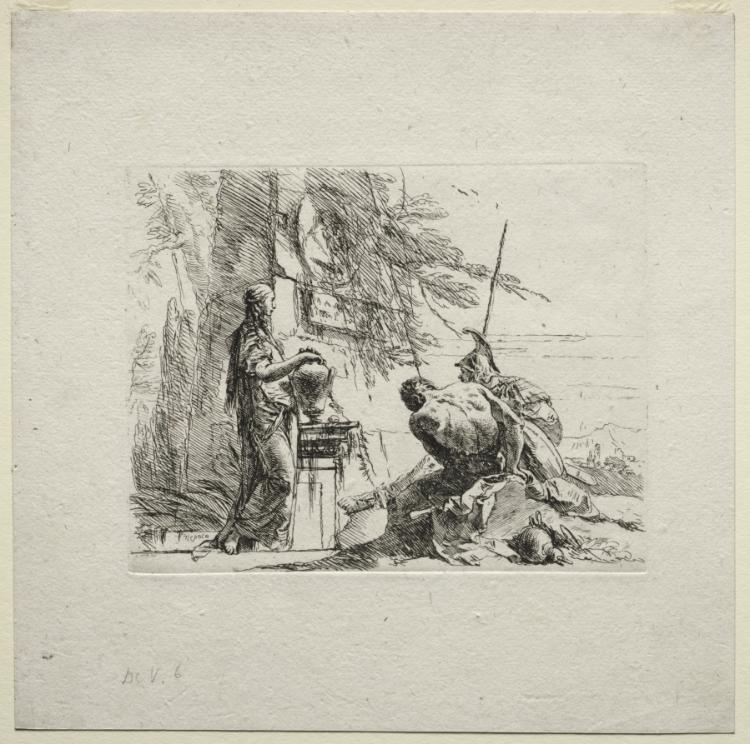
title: Various Caprices: The Woman Standing with Hands on a Vase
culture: Italy, 18th century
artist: Giovanni Battista Tiepolo (Italian, 1696–1770)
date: 1735–50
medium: etching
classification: Print